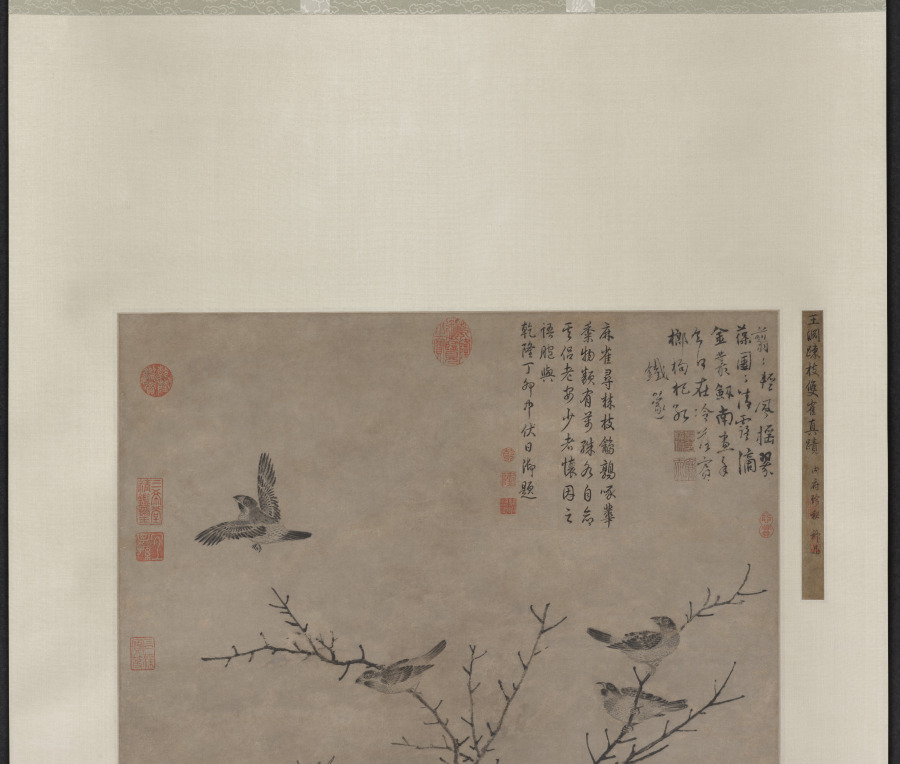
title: Quails and Sparrows in an Autumn Scene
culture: China, Yuan dynasty (1271-1368)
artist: Wang Yuan (Chinese, c. 1299-after 1366)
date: 1347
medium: hanging scroll, ink on paper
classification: Painting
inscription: 至正丁亥春 錢塘王淵若水寫秋景鶉雀圖 [印] 澹轩; [印] 若水; [印] 墨妙筆精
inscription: 翦翦輕風搖翠葆，團團清露滴金叢。 劍南畫手今何在，冷落賓榔枸杞新。 鐵篴 [印] 杨维桢印; [印] 廉夫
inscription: 1 inscription and 10 seals of the Qianlong emperor (r. 1736-95)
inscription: 4 seals of Zhang Heng 張珩 (1915-1963)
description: The flower-and-bird subjects here are depicted in a meticulous manner, echoing the academic tradition but translating the customarily colored images to plain monochrome. Fine ink lines combined with carefully graded washes define the contours and give subtle modeling to the natural forms. Wang Yuan excelled in flower-and-bird subjects as well as landscape and figure paintings. A child prodigy, he was instructed by the great Yuan master Zhao Mengfu at an early age.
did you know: Wang Yuan was from Qiantang, today’s Hangzhou in eastern China.